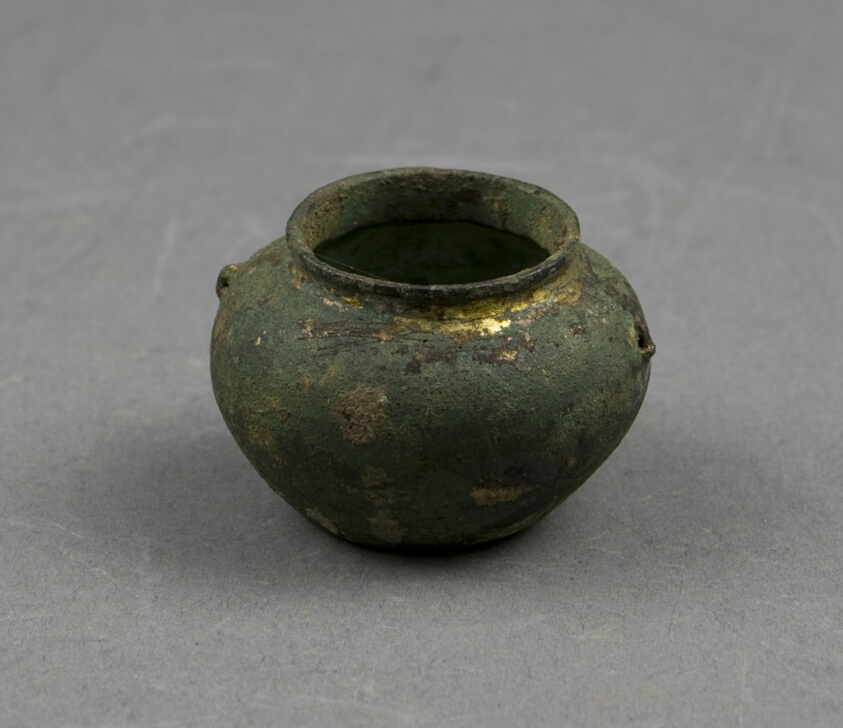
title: Miniature Jar (Guan)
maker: China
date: Tang dynasty (618–906 CE)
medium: Gilt bronze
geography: China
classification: bronze; metal; decorative object/ornament; asian art